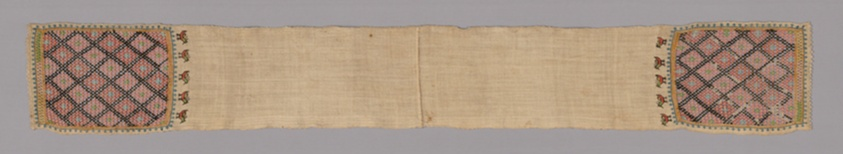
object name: Costume and Accessories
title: Sash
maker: Turkey or Eastern Europe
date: 19th century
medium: embroidered in openwork pattern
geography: Turkey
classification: textile; needlework (visual works); weaving; costume